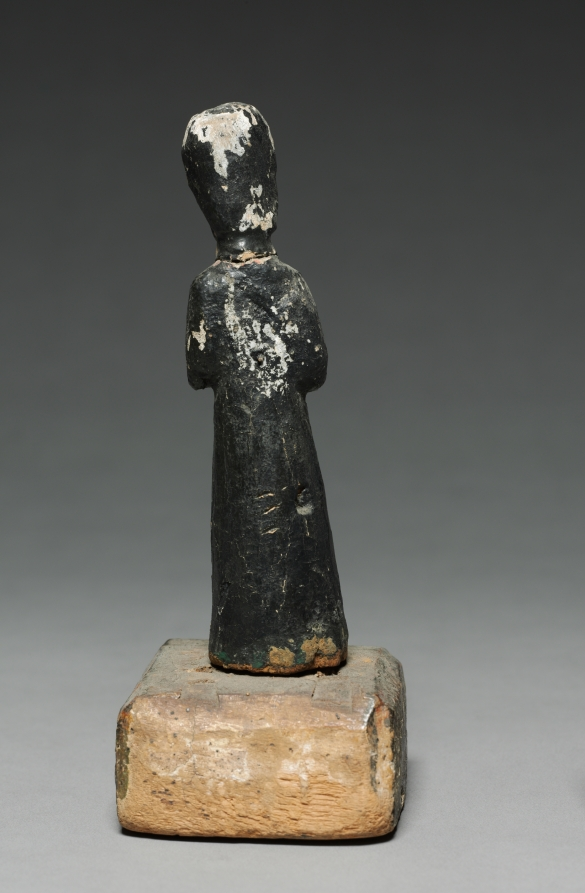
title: San Antonio: santo de bulto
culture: America, New Mexico, 17th-18th century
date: 17th-18th Century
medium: painted wood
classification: Sculpture